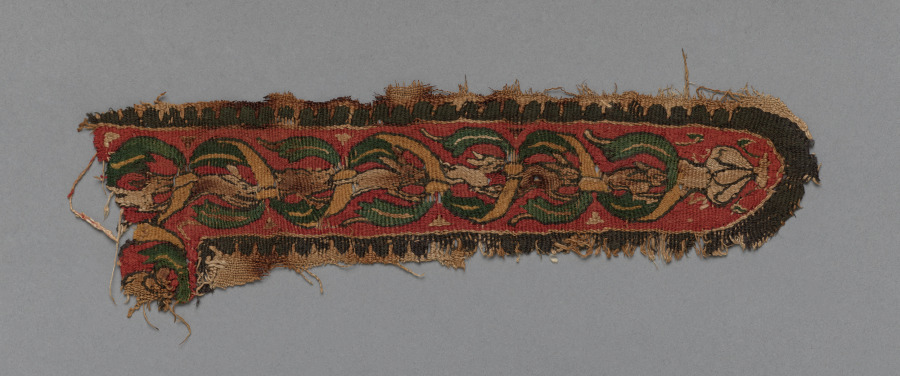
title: Fragment from a Tunic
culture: Egypt, 6th - 16th century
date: 500s - 1500s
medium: tabby weave with inwoven tapestry ornament, linen and wool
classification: Textile